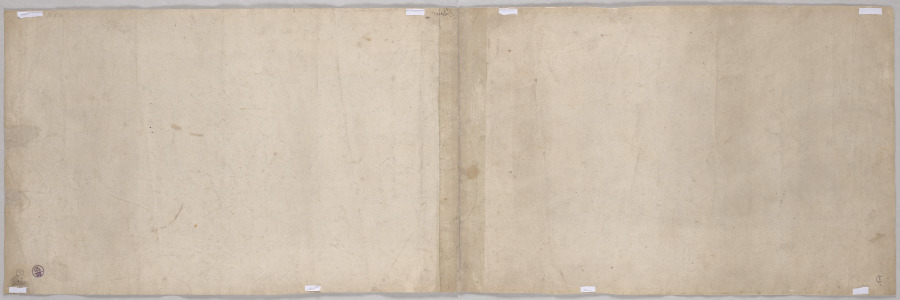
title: The Manor House, Cresswells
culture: Netherlands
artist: Hendrick Danckerts (Dutch, 1625–1680)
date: c. 1665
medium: Pen, ink, wash with watercolor on two conjoined pieces of paper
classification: Drawing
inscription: Watermark: Strasburg Bend & Lily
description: The Anglo-Dutch painter, Hendrick Danckert, made this panoramic view of the manor house at Cresswells, Bray, in Berkshire, England around 1670. The drawing was preparatory for a painting of the house, presumably commissioned by its owner, Henry Somerset, 1st Duke of Beaufort. The genre of topographical painting that flourished in England beginning in the 17th century accompanied the building boom after the Restoration (1660), which was funded in large part by the American colonies. Many Dutch artists, trained in landscape painting in their native country, emigrated to England to meet the demand. Danckerts was among the first to incorporate watercolor into his drawings, a genre that would flourish in England in the following centuries.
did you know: The timber-framed house depicted here was built in the fifteenth century and demolished in the eighteenth century.